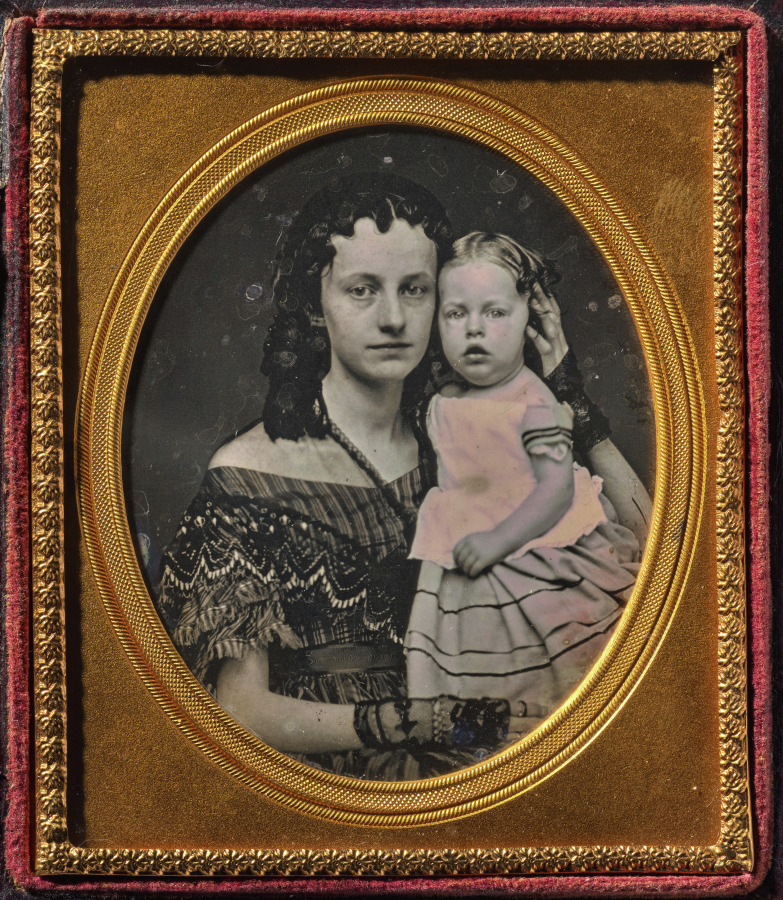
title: Mother and Child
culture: America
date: c. 1860–65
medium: daguerreotype, applied color, sixth-plate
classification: Photograph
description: Some of the most inventive and technically skilled practitioners in the early history of photography are as yet unidentified. However, with time more of these individuals will probably be recognized by name. Introduced into America soon after its invention in 1839 by the Frenchman Louis-Jacques-Mandé Daguerre, the daguerreotype flourished from 1840 to the mid-1860s. This beautiful daguerreotype in its original case is an outstanding example of a very popular subject: mother and child. The polished silver plate precisely renders in warm tones the likeness of the elaborately dressed sitters. The mother gently steadied the child's head so that it would not move during the long exposure required by the daguerreotype process. Clearly, the maker's knowledge of chemistry and traditional principles of design were necessary for this charming portrait.